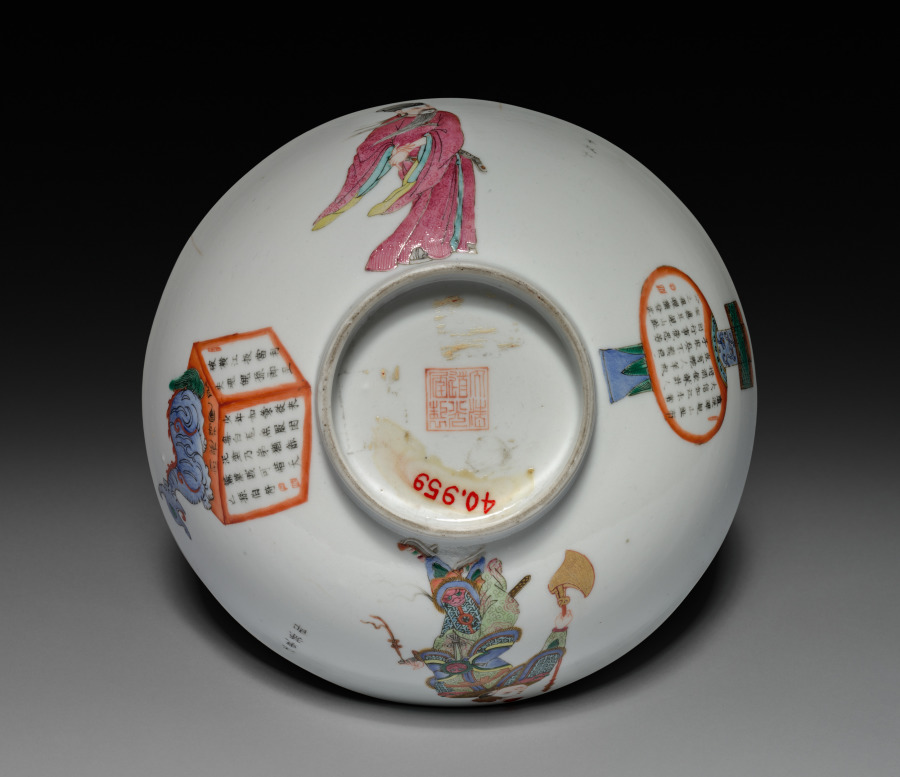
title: Bowl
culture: China, Qing dynasty (1644-1911)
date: 1821–1850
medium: porcelain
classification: Ceramic